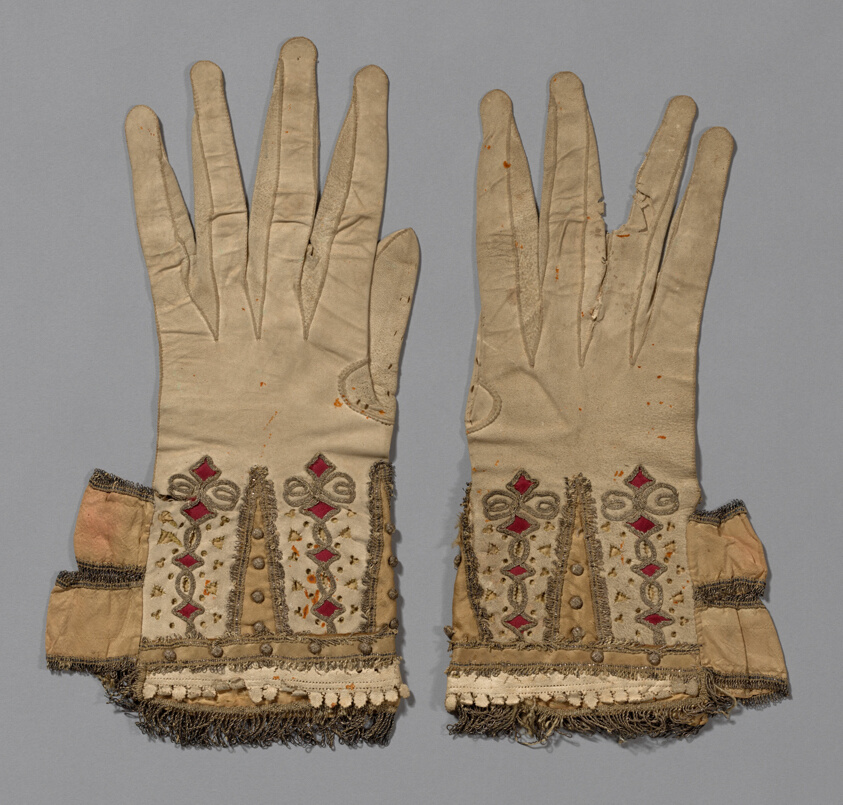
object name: Costume and Accessories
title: Pair of Gloves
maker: England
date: 1601/50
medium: Leather, cut, pricked and slashed; silk satin appliqué; gilt-metal-strip-wrapped silk couching; gilt-metal-strip-wrapped silk woven fringe; balls covered with gilt-metal-wrapped-silk; ribbons of silk, plain weave edged with gilt-metal-strip-wrapped silk woven fringe; lining: silk, plain weave; interlining: linen, plain weave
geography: England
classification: textile; needlework (visual works); costume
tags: fashion